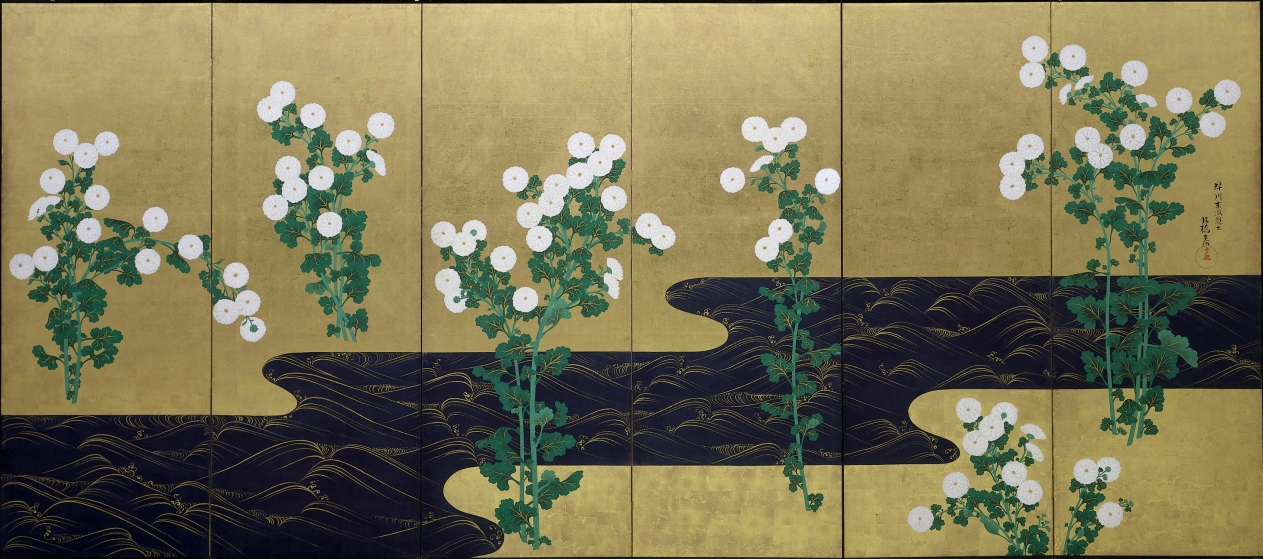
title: Chrysanthemums by a Stream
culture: Japan, Edo period (1615–1868)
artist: possibly by Ogata Kōrin (Japanese, 1658–1716)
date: c. 1715–30 or after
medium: One of a pair of six-panel folding screens; ink and color on gilded paper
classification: Painting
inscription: the signature and seal of Korin, "sensen mappa (makko) inshi hokyo Korin" (late generation hermit of the Kamo stream tradition) is written in two lines. A circular seal which reads "Hoshuku" is at the end of the second line on the edge of the first panel from the right.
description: These screens recall a painting style so closely identified with Ogata Kōrin (1658–1716) that it is called Rinpa, or “Rin School,” after the ideograph “rin” in his name. The highly stylized background accentuates floral groupings that have been groomed so as to appear utterly artificial, like the synthetic arrangements available today. Kōrin's genius derived in large measure from natural phenomena painstakingly observed and then manipulated to create compositions of startling refinement and sparkling isolation. This process may have grown out of Kōrin's early immersion in the family textile business, a medium that encourages such dramatic distillations of form: the stream's gold-crested waves bring to mind traditional kimono robe designs of Kōrin's era. Works with the signature seen on this painting, including a style name, or persona suggested to Kōrin by his brother Kenzan (1663–1743), are sometimes considered to have been produced either in the last year of his life, when he was very ill, or after his death. In both scenarios, the lion’s share of the work would have been done by studio assistants, but little is truly known of his studio practice. Given the regularity of the gold waves on the stream, and the tension in the arrangement of the chrysanthemums, it is also possible that the screens were made in emulation of Kōrin's designs by a later artist.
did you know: The signature used on these screens may indicate paintings made in the last year of the artist's life, or works completed by his studio after his death.